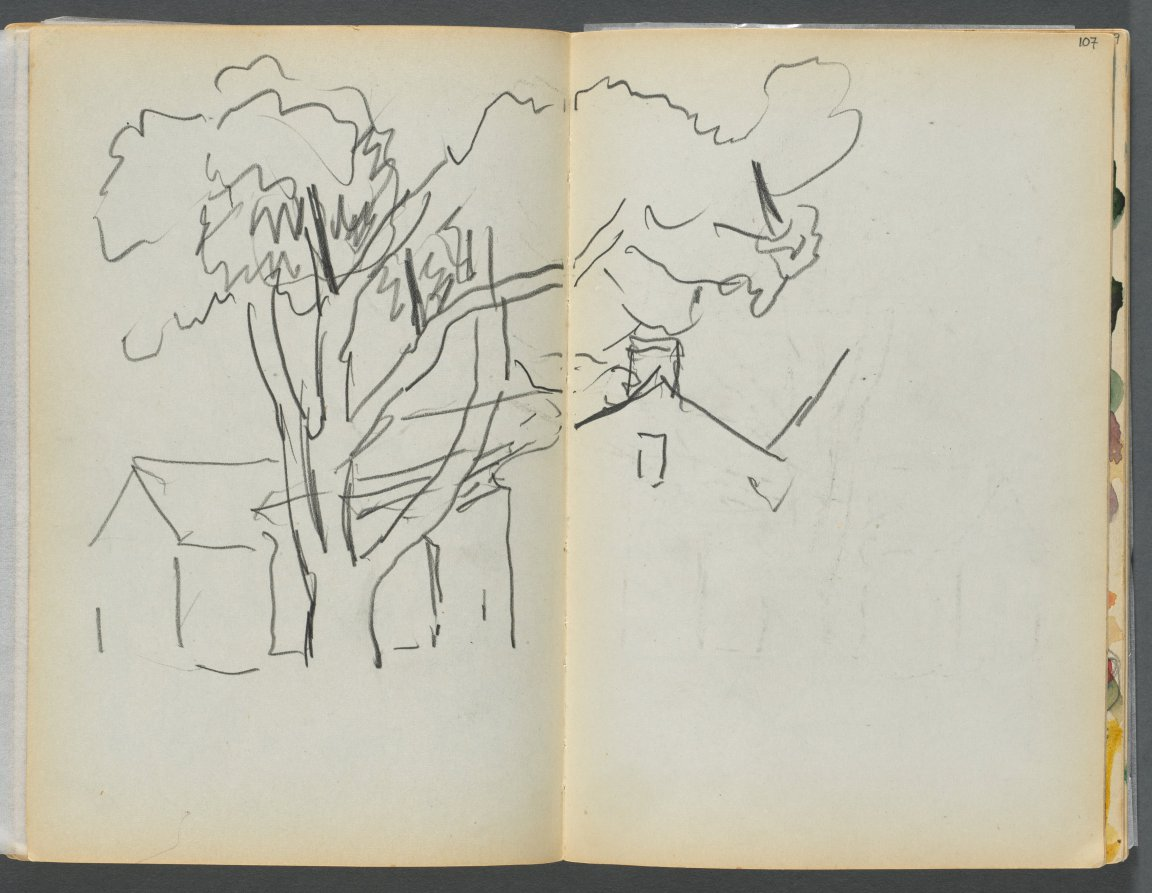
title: Sketchbook- The Granite Shore Hotel, Rockport, page 106 & 107: Tree with Houses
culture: America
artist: Maurice Prendergast (American, born Newfoundland [now Canada], 1858–1924)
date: 1905–10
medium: graphite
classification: Bound Volume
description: This sketchbook contains 72 pages of pencil drawings and 9 watercolors of Cape Ann. On the inside of the cover Prendergast wrote the address of the Granite Shore Hotel in Rockport, Massachusetts.